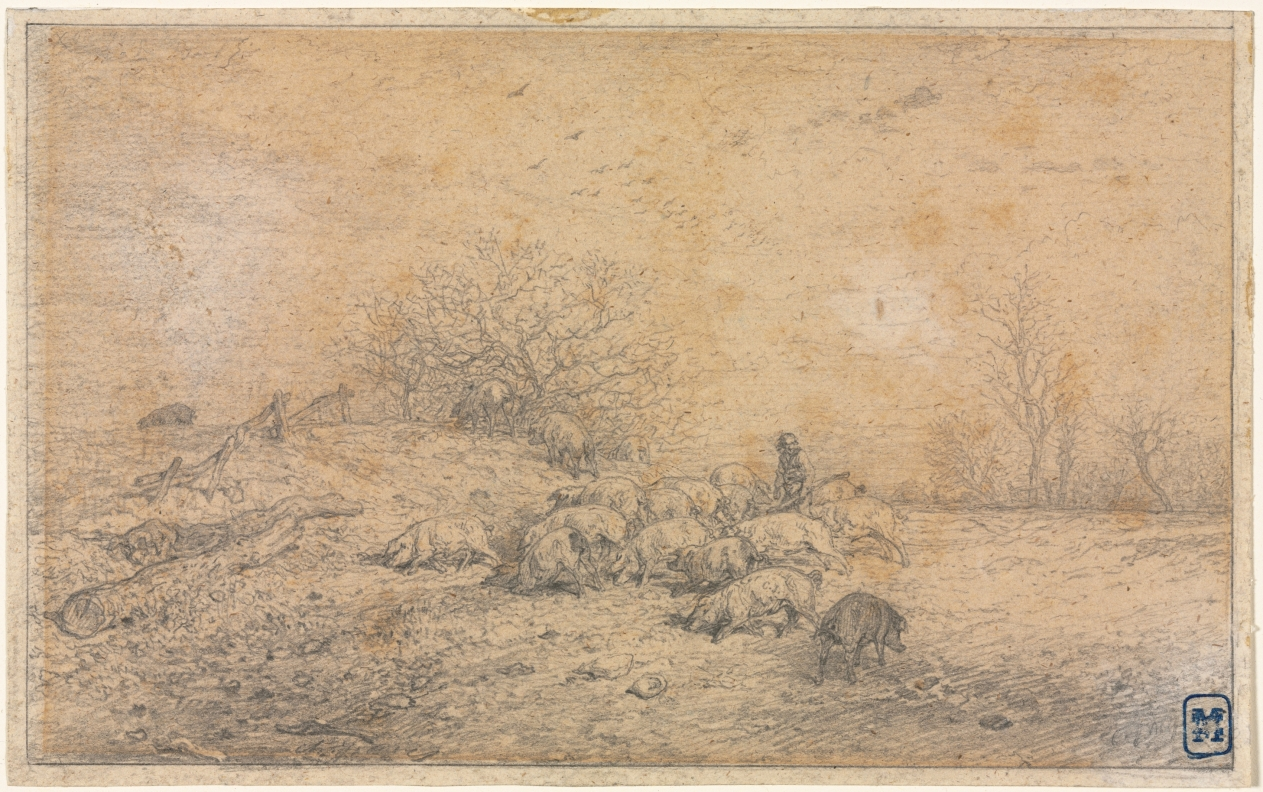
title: Herd of Pigs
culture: France, 19th century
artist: Charles-Émile Jacque (French, 1813–1894)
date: c. 1845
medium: graphite; framing lines in graphite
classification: Drawing